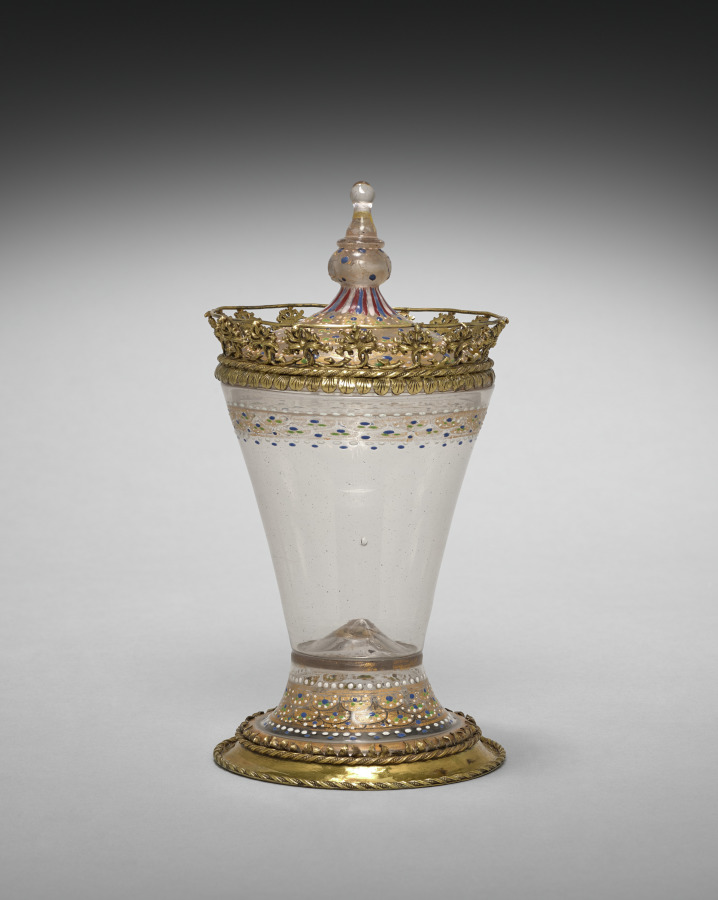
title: Covered Beaker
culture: Italy, Venice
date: c. 1490–1500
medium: glass, enameled and gilded, gilt-silver mounts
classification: Glass